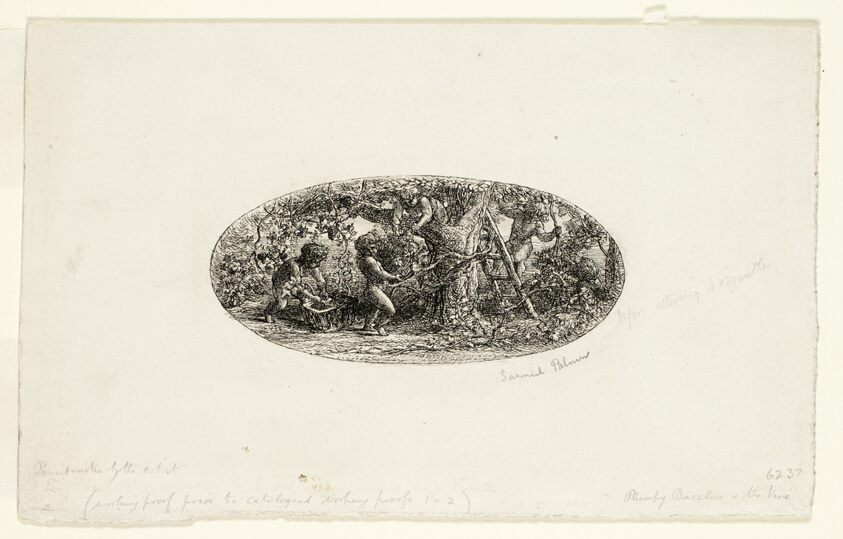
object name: Print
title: Plumpy Bacchus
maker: Samuel Palmer (English, 1805-1881)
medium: Etching in black on paper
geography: England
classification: etching; print; prints and drawing